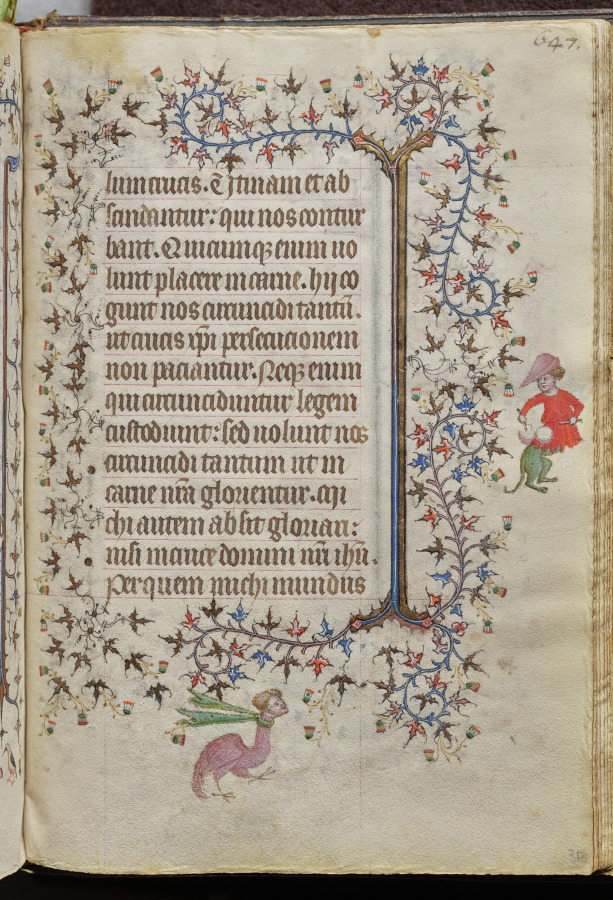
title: Hours of Charles the Noble, King of Navarre (1361-1425), fol. 318r, Text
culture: France, Paris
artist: Master of the Brussels Initials and Associates (French)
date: c. 1405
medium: ink, tempera, and gold on vellum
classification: Bound Volume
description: This precious volume was obviously highly prized by its owner, the French-born King of Navarre, who had his coat of arms painted on no less than twenty folios. Rather than directly commissioning this manuscript from a specific workshop, it seems that Charles the Noble acquired his book of hours -- perhaps ready-made for the luxury market -- while on a trip to Paris in 1404-05. A collaborative effort, six painting styles are evidenced within the pages of this codex, those of two Italians, two Frenchmen, and two Netherlanders. The painter who was responsible for the planning and decoration of the book, and who produced seventeen of the large miniatures, was a Bolognese artist known as the Master of the Brussels Initials. His principal assistant, responsible for most of the borders, was a Florentine who signed his name "Zecho" da Firenze on folio 208 verso.